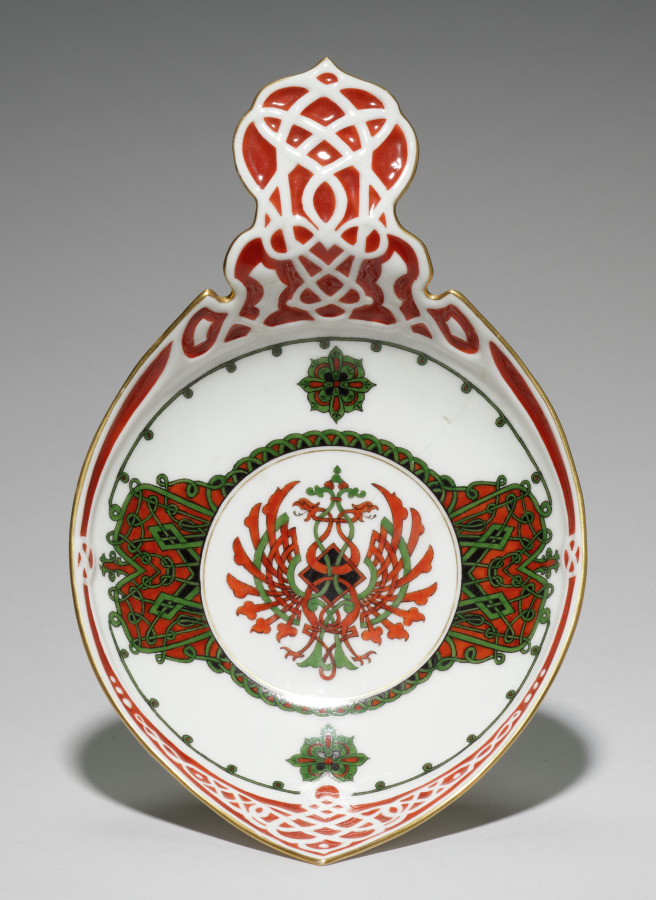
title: Cup (Kovsh)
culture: Russia, St. Petersburg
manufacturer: Kornilov Brothers (Russian, established 1835)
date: 1893–1917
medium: porcelain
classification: Ceramic